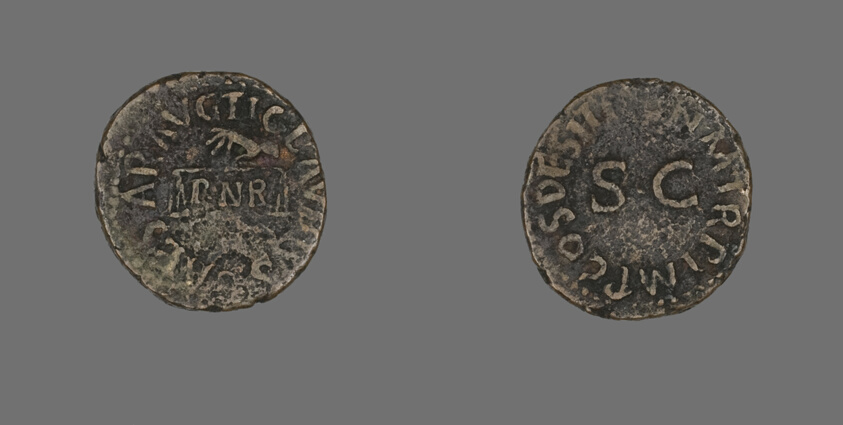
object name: Coin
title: Coin Depicting Hand with Scales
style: roman (ancient, style or period), ancient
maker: Roman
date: 41-54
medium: Bronze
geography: Roman Empire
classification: coin; ancient art